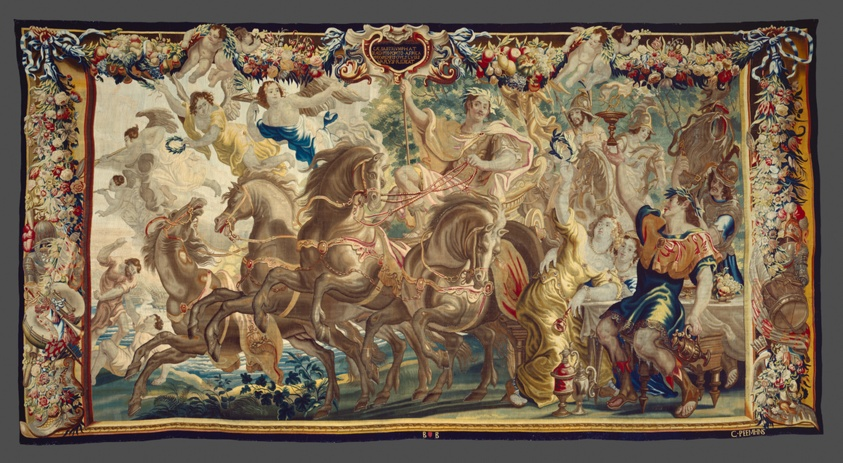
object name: Textile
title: The Triumph of Caesar from The Story of Caesar and Cleopatra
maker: After a design by Justus van Egmont (1601–1674); Produced at the workshop of Gerard Peemans (1637/39–1725); Flanders, Brussels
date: c. 1680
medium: Wool and silk, slit and double interlocking tapestry weave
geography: Flanders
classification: weaving - tapestry; textile